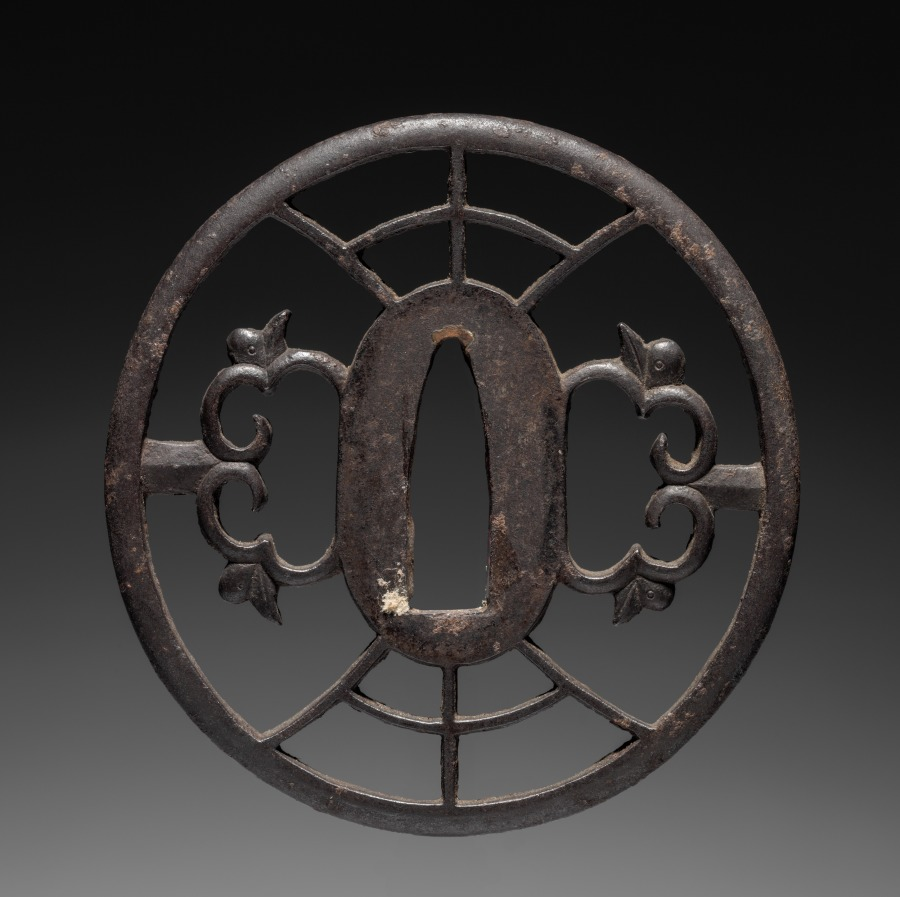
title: Sword Guard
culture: Japan, Edo period (1615–1868)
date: 1615–1868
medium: iron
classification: Arms and Armor